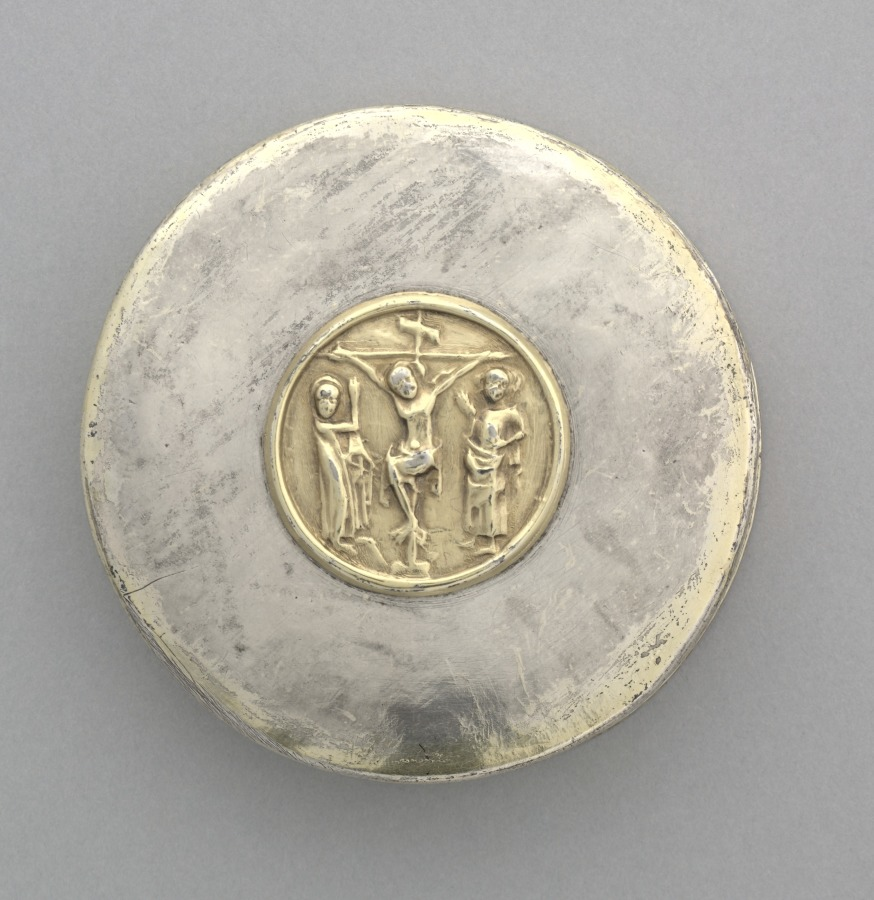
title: Pyx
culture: Austria, probably Salzburg, 14th century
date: c.1300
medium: silver and gilt silver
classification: Metalwork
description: A pyx is a container designed to hold the consecrated Eucharist wafers between masses. It was probably used by the clergy to administer communion to the sick and dying; its small size made it easily portable. The decoration relates to similar liturgical objects made in the ecclesiastical and artistic center of Salzburg for the cathedral treasury of that city.